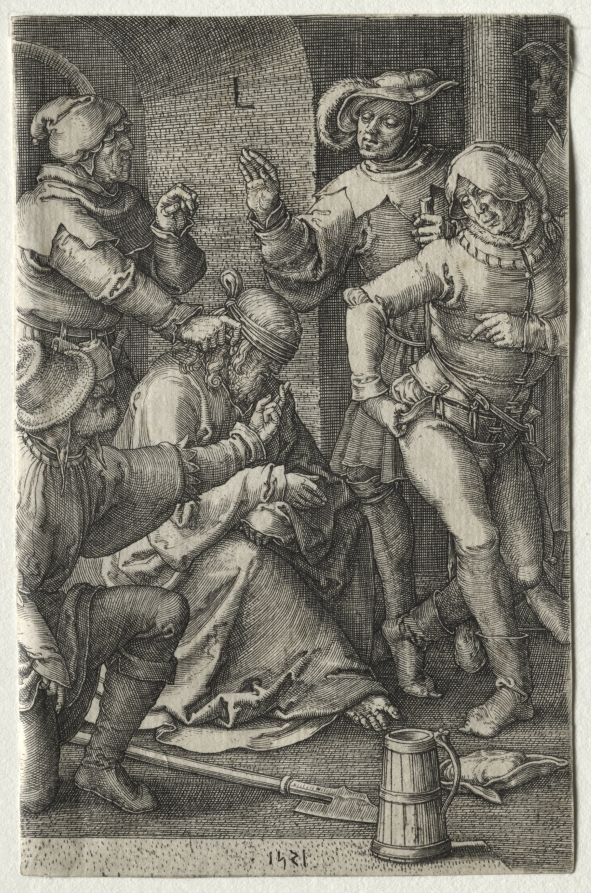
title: The Passion: The Mocking of Christ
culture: Netherlands, 16th century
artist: Lucas van Leyden (Netherlandish, 1494–about 1533)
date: 1521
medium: engraving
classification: Print